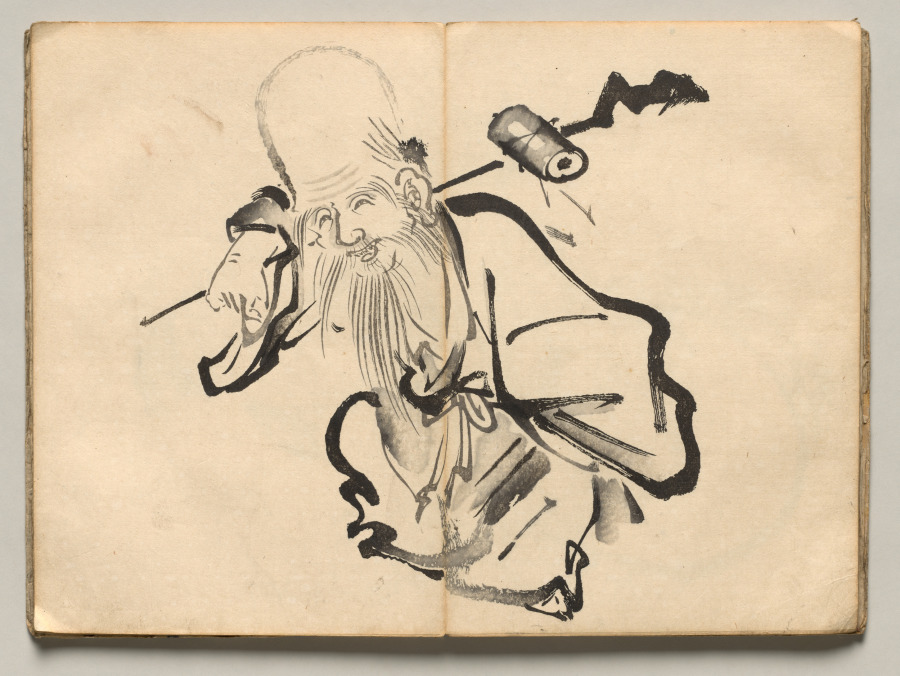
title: Fukurokuju from Ōkyo Picture Book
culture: Japan, Edo period (1615–1868)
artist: after Maruyama Ōkyo (Japanese, 1733–1795)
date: 1850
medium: accordion-style woodblock printed folding-book; ink and color on paper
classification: Bound Volume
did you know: This impression of a book of woodblock-printed designs is missing a spread that depicts a crane.